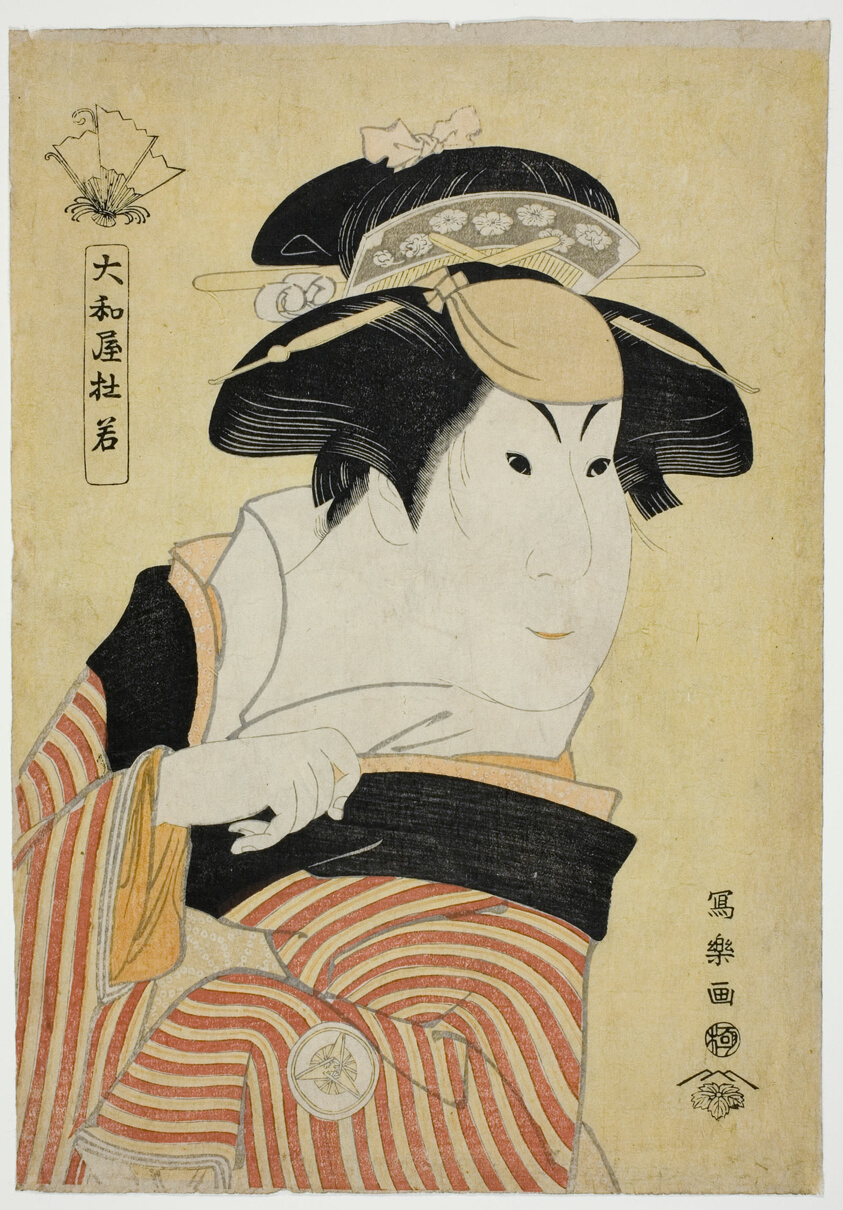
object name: Print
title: Yamatoya Tojaku (The Actor Iwai Hanshiro IV as Otoma, Daughter of Ohina from Inamuragasaki in Kamakura) (Yondai-me Iwai Hanshiro no Kamakura Inamuragasaki no Ohina musume Otoma)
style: Japanese (culture or style)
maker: Toshusai Sharaku 東洲斎 写楽; Japanese, active 1794-95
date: 1794 (Kansei 6)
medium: Color woodblock print; aiban, nishiki-e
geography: Japan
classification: woodblock print; print; asian art